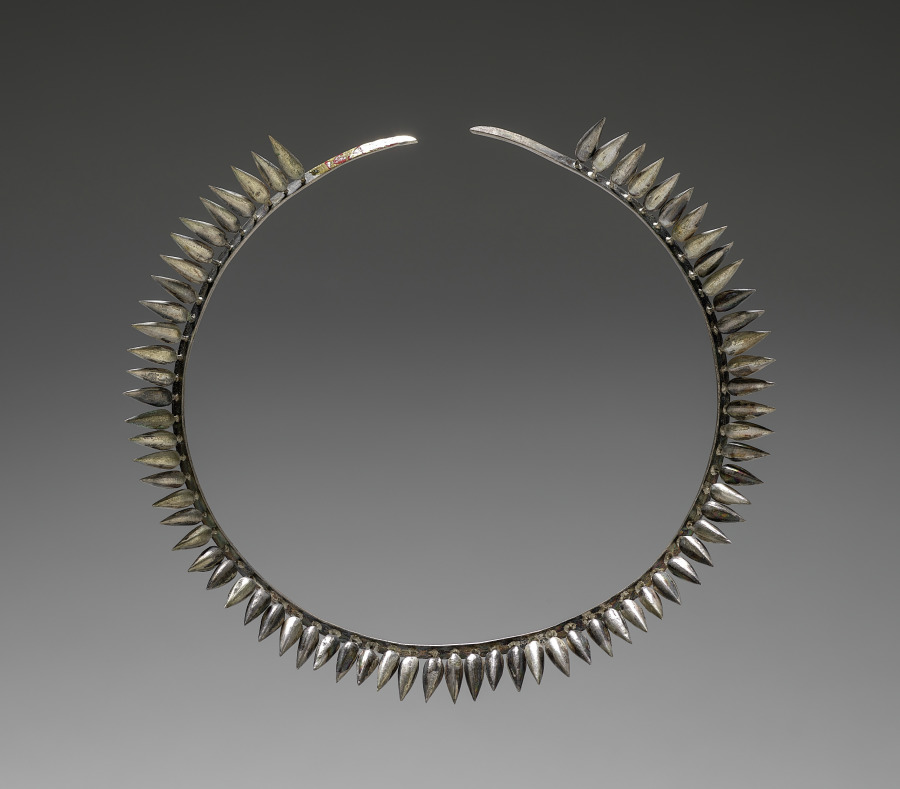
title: Necklace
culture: India (?)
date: 1800s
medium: silver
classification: Jewelry